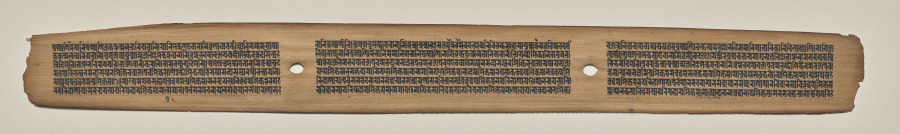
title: Text, Folio 15 (recto), from a Manuscript of the Perfection of Wisdom in Eight Thousand Lines (Ashtasahasrika Prajnaparamita-sutra)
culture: Eastern India, Bihar, Vikramashila Monastery. Painting: Nepal, Kathmandu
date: Sunday, September 14, 1119 (year 239 of the Newar Samvat in the month of Ashvina)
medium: gum tempera and ink on palm leaves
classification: Painting